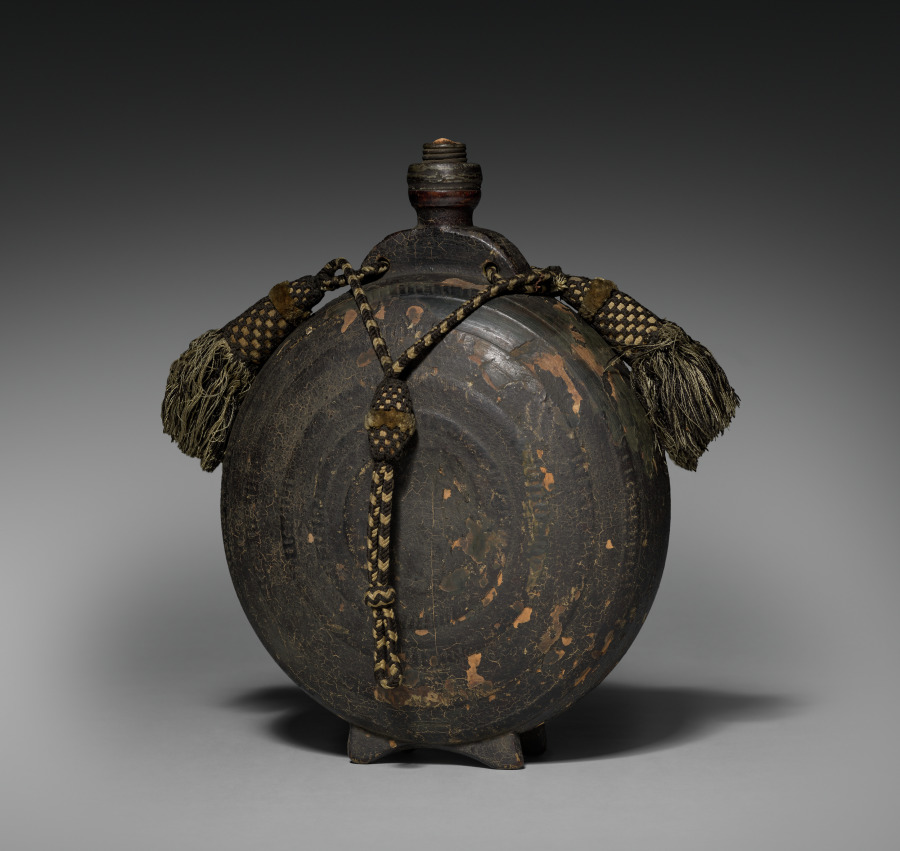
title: Powder Canister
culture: Italy, 18th century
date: 1700s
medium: wood painted black, lead charger, pewter mount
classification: Arms and Armor